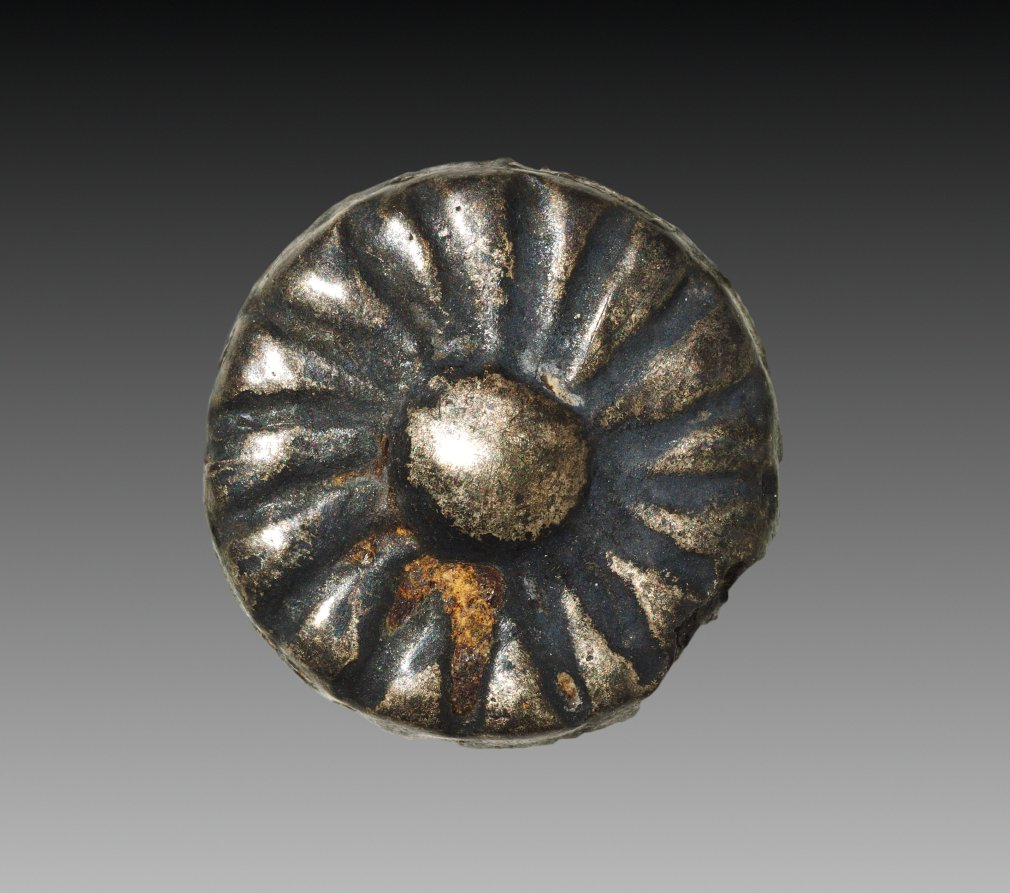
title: Rosette for Wig Decoration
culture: Egypt, Middle Kingdom (2040–1648 BCE), Dynasty 12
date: 1980–1801 BCE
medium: silver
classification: Jewelry